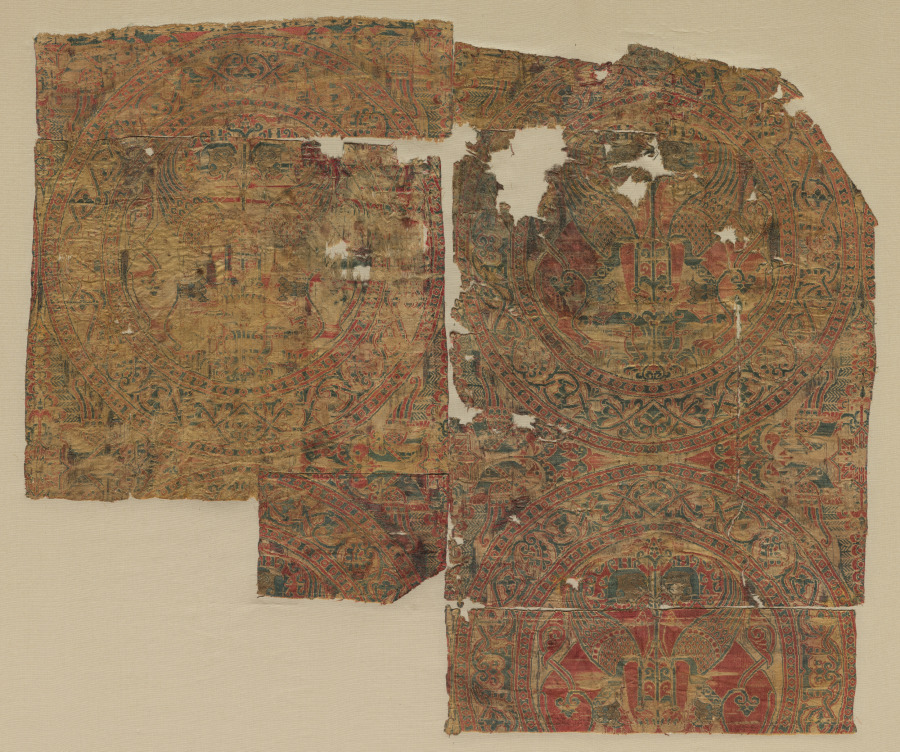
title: Fragment with confronted sphinxes in roundels from the tomb of Saint Bernard Calvo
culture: Spain, Almeria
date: 1200–43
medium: Silk and gold thread: lampas, taqueté, and plain-weave variant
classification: Textile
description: Composite creatures, such as winged lions and sphinxes, predate the rise of Islam in the Arabian Peninsula. Islamic textiles continued to include them for centuries after the Arab conquest of Spain. Pairs of lions with gold faces rear up to bite the haunches of the winged beasts. In between the roundels are pairs of peacocks, motifs traceable to pre-Islamic Persian art that spread throughout the Islamic world, including Spain. The body of Saint Bernard Calvo, the Catholic Bishop of Vich in 1233–43, was wrapped in textiles, including these fragments that still retain traces of his blood.